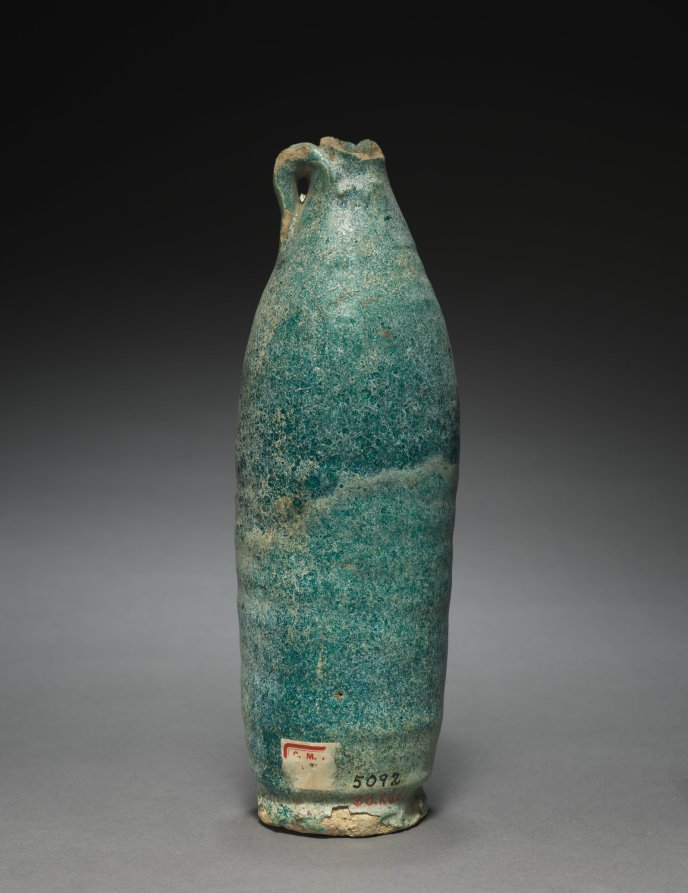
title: Vase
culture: Parthian Empire (247 BCE–224 CE)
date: 1–200 CE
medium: terracotta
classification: Ceramic